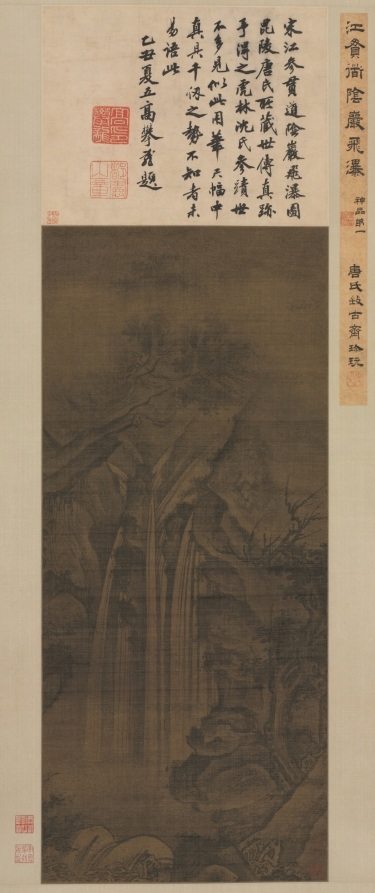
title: Waterfall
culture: China, Song dynasty (960-1279) - Yuan dynasty (1271-1368)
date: 1271–1368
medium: hanging scroll, ink and slight color on silk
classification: Painting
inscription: Label on the mounting with 2 seals of T'ang ? of Pi-ling (16th c.); label on back of mounting of Kü Kuang-hsü (1731-1797). 1 colophon and 8 additional seals: 1 colophon, dated 1625, and 2 seals of Kao P'an-lung (1562-1626); 2 seals of Liu Shu (1759-1816); 1 seal of Pi Lung (late 18th c.); 1 seal of Ts'ao tzu-wen; 2 seals unidentified. WKH